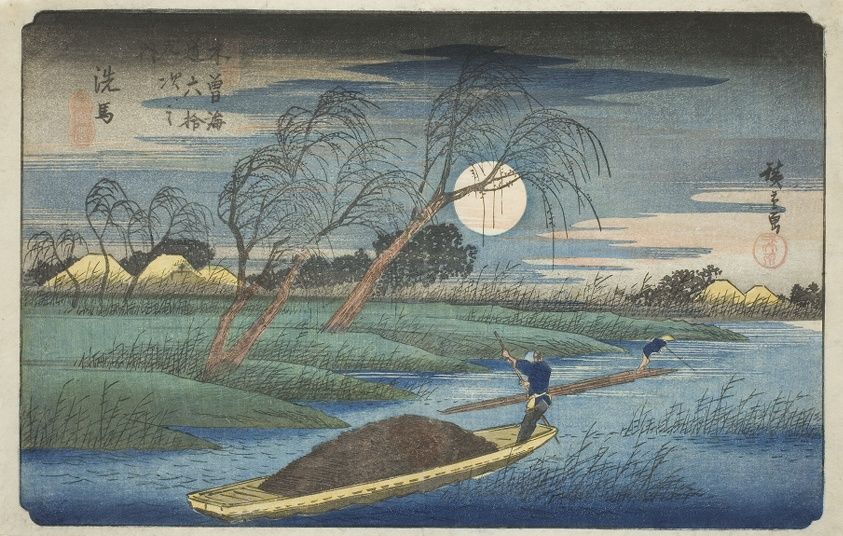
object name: Print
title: No. 32: Seba, from the series "Sixty-nine Stations of the Kisokaido (Kisokaido rokujukyu tsugi no uchi)"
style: Japanese (culture or style)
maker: Utagawa Hiroshige 歌川 広重; Japanese, 1797-1858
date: c. 1835/38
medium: Color woodblock print; oban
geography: Japan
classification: woodblock print; print; asian art